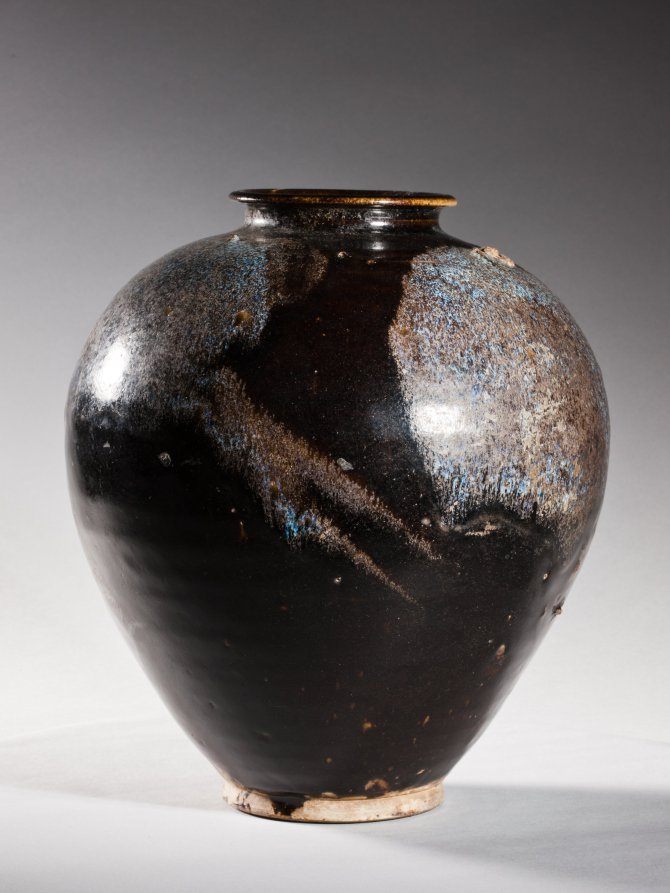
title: Jar: Black Ware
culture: China, Henan province, Huangdao kilns, Tang dynasty (618-907)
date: 700s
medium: glazed stoneware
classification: Ceramic